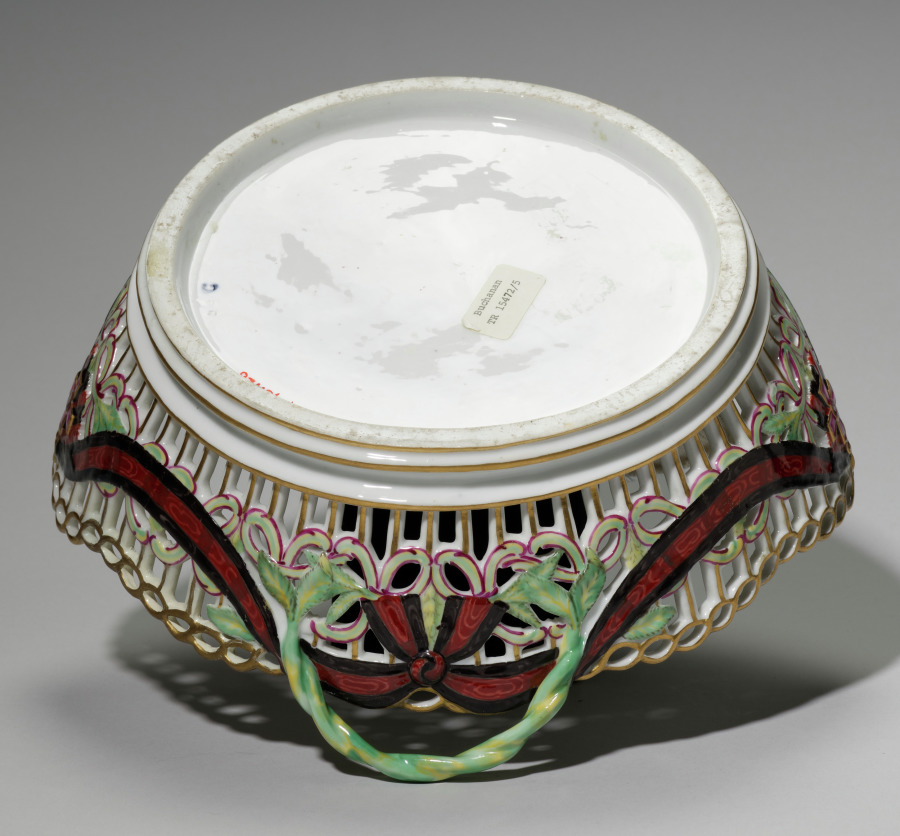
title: Fruit Basket (Corbeille)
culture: Russia, Moscow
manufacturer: Gardner Factory (Russian)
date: c. 1783–85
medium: porcelain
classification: Ceramic